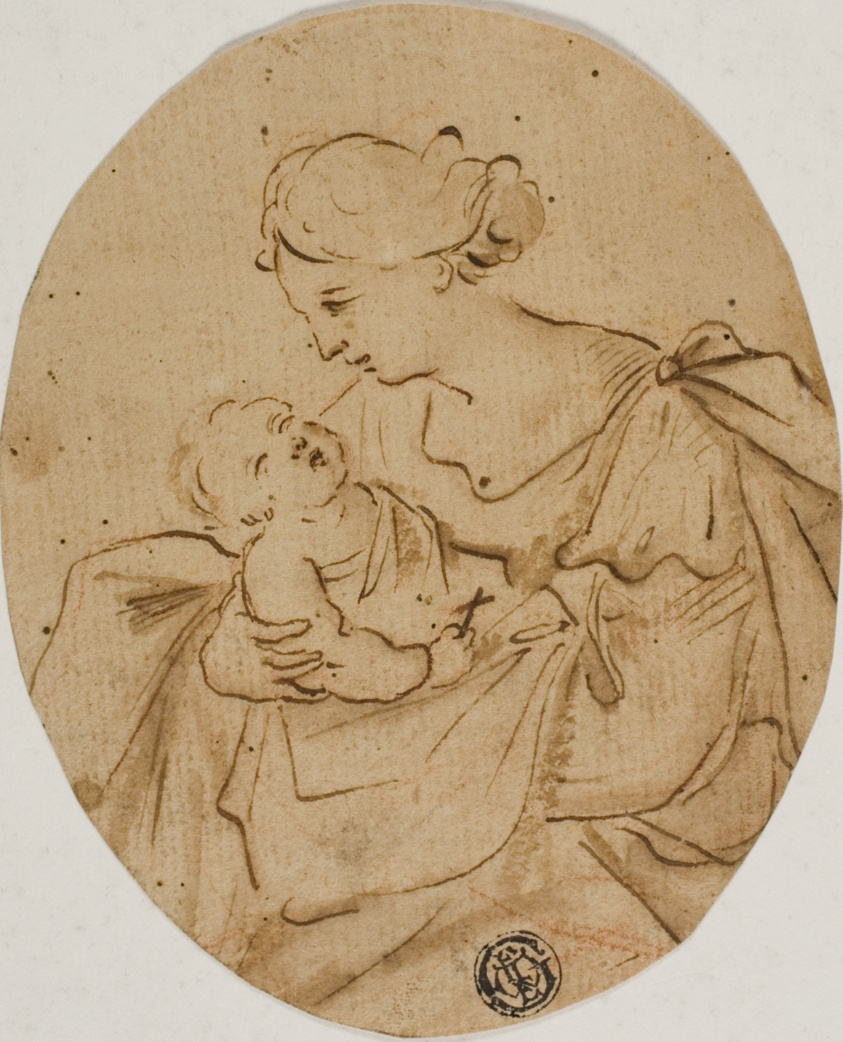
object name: Drawing and Watercolor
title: Madonna and Child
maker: Unknown Artist; Italian, 18th century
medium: Pen and brown ink, with brush and brown wash, over red chalk, on oval-shaped tan laid paper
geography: Italy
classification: pen and ink drawings; drawings (visual works); prints and drawing